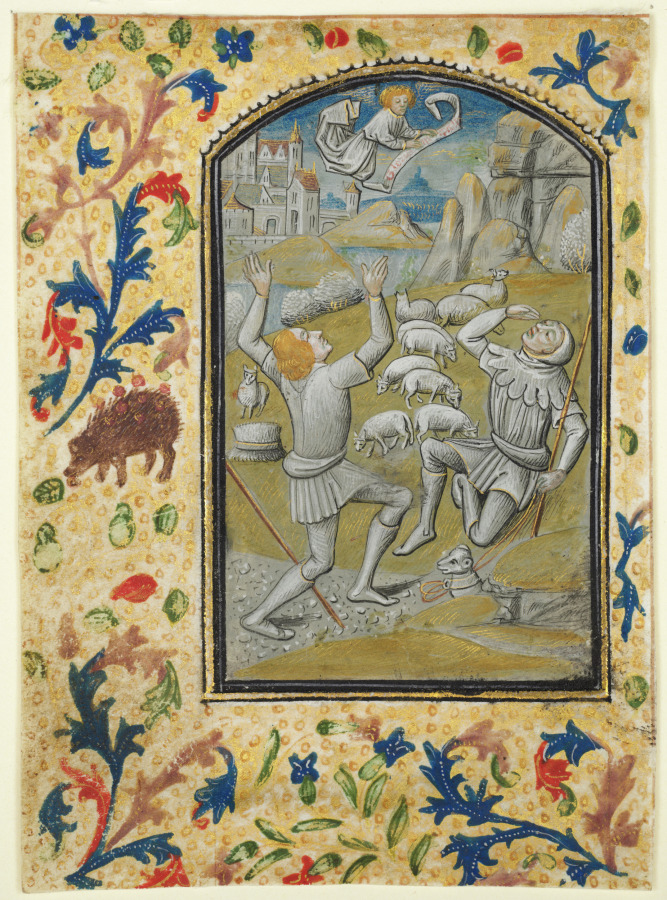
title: Leaf from a Book of Hours: Annunciation to the Shepherds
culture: Flanders, Bruges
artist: Guillaume Vrelant (Flemish, c. 1454–1481)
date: c. 1470–1480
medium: tempera, liquid gold, and grisaille on vellum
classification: Manuscript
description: Guillaume Vrelant, born in Utrecht, was known to be in Bruges from 1454 onward where he died around 1481. He probably went there to sidestep a 1427 law which banned the sale of Utrecht images. A painter very much in vogue, he founded the Illuminators’ Guild in Bruges under the patronage of Saint John the Evangelist. He is known to have provided manuscripts to the Burgundian court.